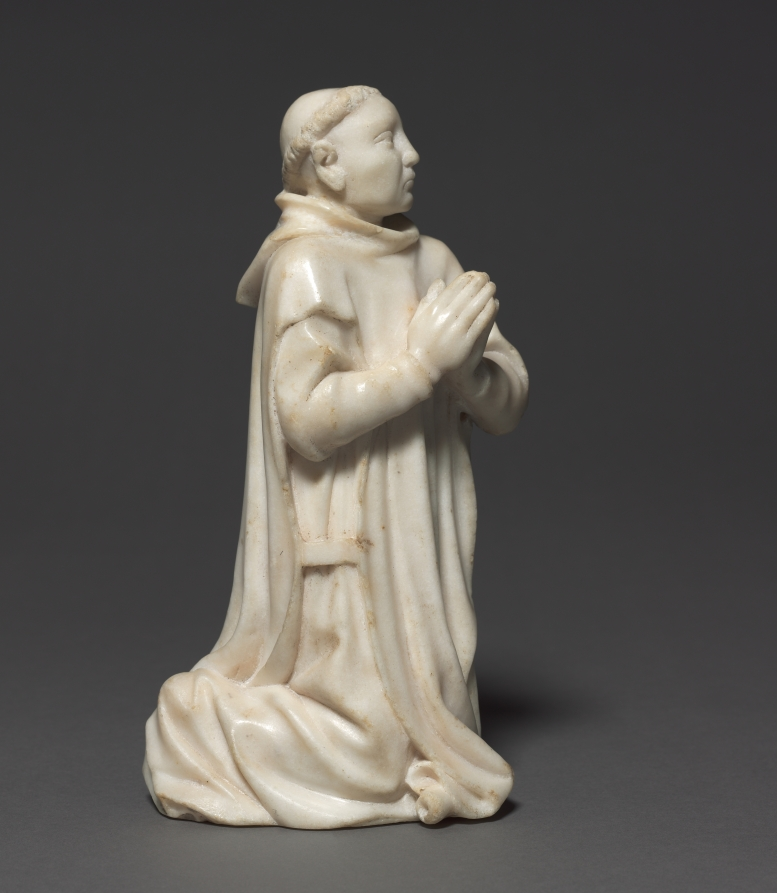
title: Kneeling Carthusian Monk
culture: France, Burgundy, Dijon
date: c. 1380–1400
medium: marble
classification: Sculpture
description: These are the only known surviving sculpted examples of kneeling Carthusian monks. Depictions of Carthusians in the same act of piety are found in paintings such as the one in this room from the Chartreuse de Champmol. These two figures are believed to come from the same Carthusian monastery as the mourners displayed nearby and would have formed part of a private devotional group, probably in a monk’s cell, with a sculpture of the crucified Christ or the Virgin positioned between them. They wear the recognizable white scapular, a hooded garment with front and back panels tied together with a tab.